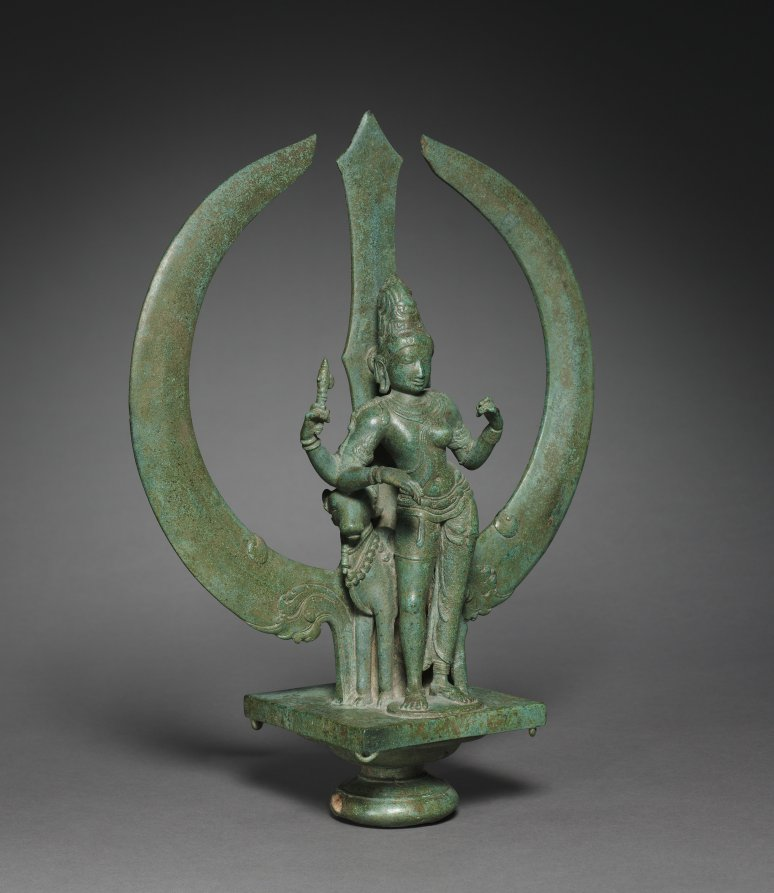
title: Trident with Shiva as Half-Woman (Ardhanarishvara)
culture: South India, Tamil Nadu, Chola period (900-13th Century)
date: c. 1050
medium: bronze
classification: Sculpture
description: The form of the trident—the main weapon of the Hindu god Shiva—dramatically and elegantly encircles his form in which the left side is female and the right side is male. The male side has the matted locks of a yogi piled high on his head; he holds an ax and leans on his mount, the bull. The female side has a jeweled crown, earring, full breast, broad hips, long skirt, and only one arm. The lower hands probably held a stringed instrument. This particular iconic form of Shiva visually indicates that he embodies all phenomena, even if they seem contradictory. He is male and female, destructive and creative, yogi and royal sovereign, hunter and musician.